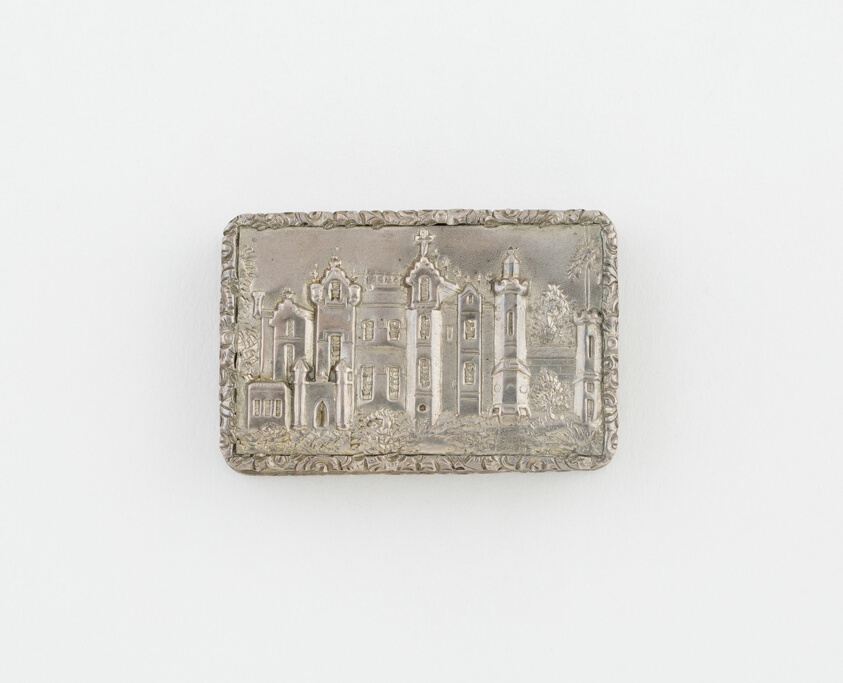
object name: Metalwork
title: Vinaigrette with View of Abbotsford House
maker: Edward Smith; Birmingham, England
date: 1840/41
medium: Silver and silver gilt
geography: Birmingham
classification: container for personal use; vinaigrette (container for health care); european decorative arts; metalwork; silver; decorative object/ornament